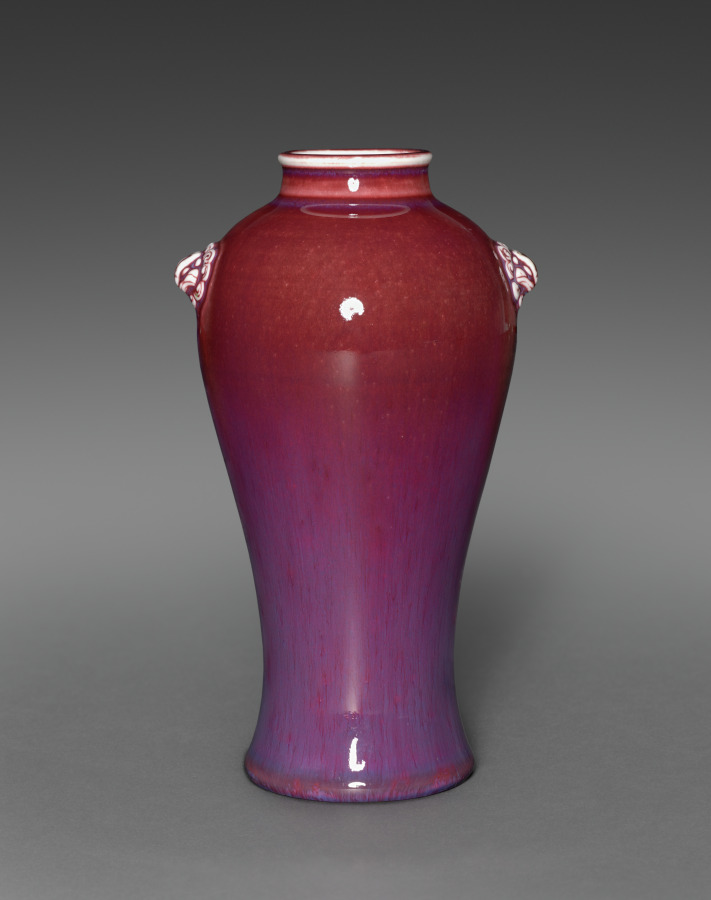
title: Single Stem Vase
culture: Japan, Taishō period (1912–26)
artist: Seifū Yohei IV (Japanese, 1872–1951)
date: 1914–46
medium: Porcelain with molded design and copper-red glaze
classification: Ceramic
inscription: 清風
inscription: 清風造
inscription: 成山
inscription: 清風盧人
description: This vase is copper red in color at the top and becomes purple closer to the bottom, not unlike a Chinese transformation or flambé glaze with mottling and dripping of the glaze. The lip of the vase and much of the lion-head designs remain white. On the box lid, the color of the glaze is called shinsha, which is often glossed as copper red or oxblood, or sometimes cinnabar. Here, it is meant to refer to a Qing-dynasty glazing technique developed in an effort to reproduce a red glaze used during the reign of the Xuande emperor (1426–35) of the Ming dynasty.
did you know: This vase has lion heads for “ears."